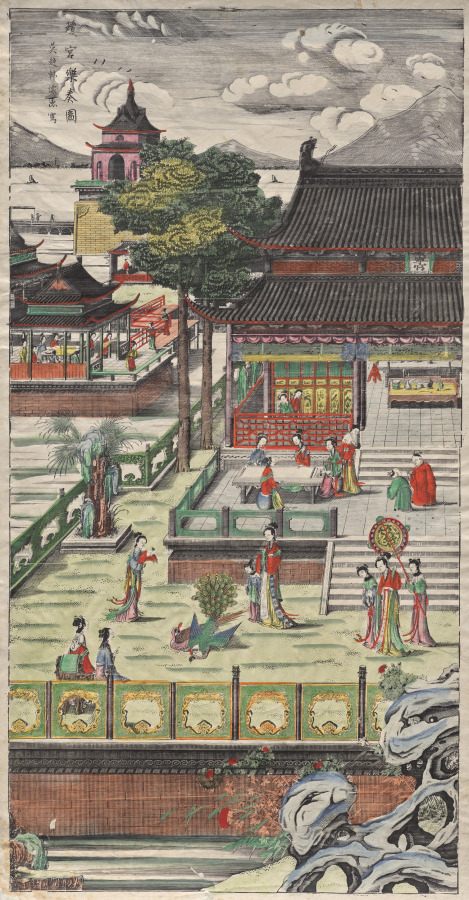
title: Music in the Jade Palace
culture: China, Qing dynasty (1644–1911), Qianlong reign (1736–95)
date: 1736–95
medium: Polychrome woodblock print; ink and color on paper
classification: Print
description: In the 1600s, printing flourished in such Jiangnan cities as Nanjing, Suzhou, Hangzhou, and Huizhou, evolving from privately enjoyed illustrated books printed in color to more commercialized single-sheet color prints that were hung on walls and became part of the rich urban visual culture.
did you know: Woodblock printing in color reached a height in China in the 1600s to 1700s. The prints were executed by means of sets of separate blocks, each carved to print a different color.